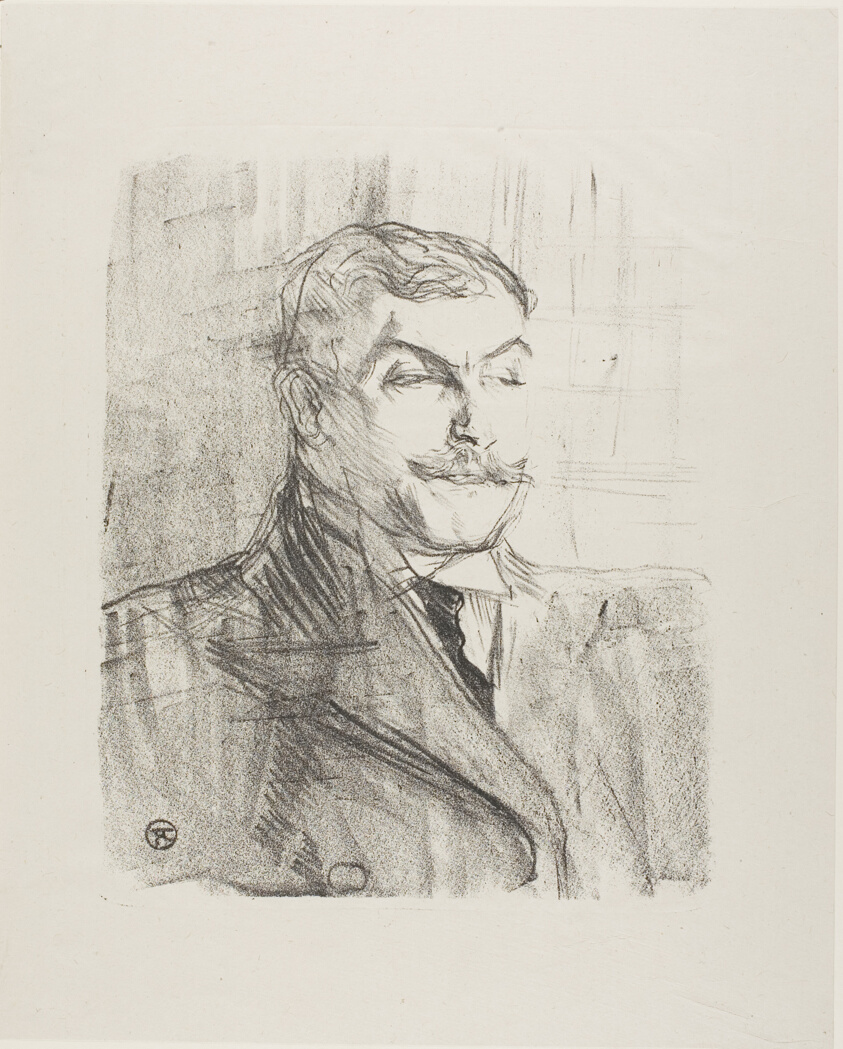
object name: Print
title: Lucien Guitry, from Treize Lithographies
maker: Henri de Toulouse-Lautrec (French, 1864-1901)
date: 1898, published before 1906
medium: Lithograph on ivory laid paper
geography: France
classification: lithograph; print; prints and drawing